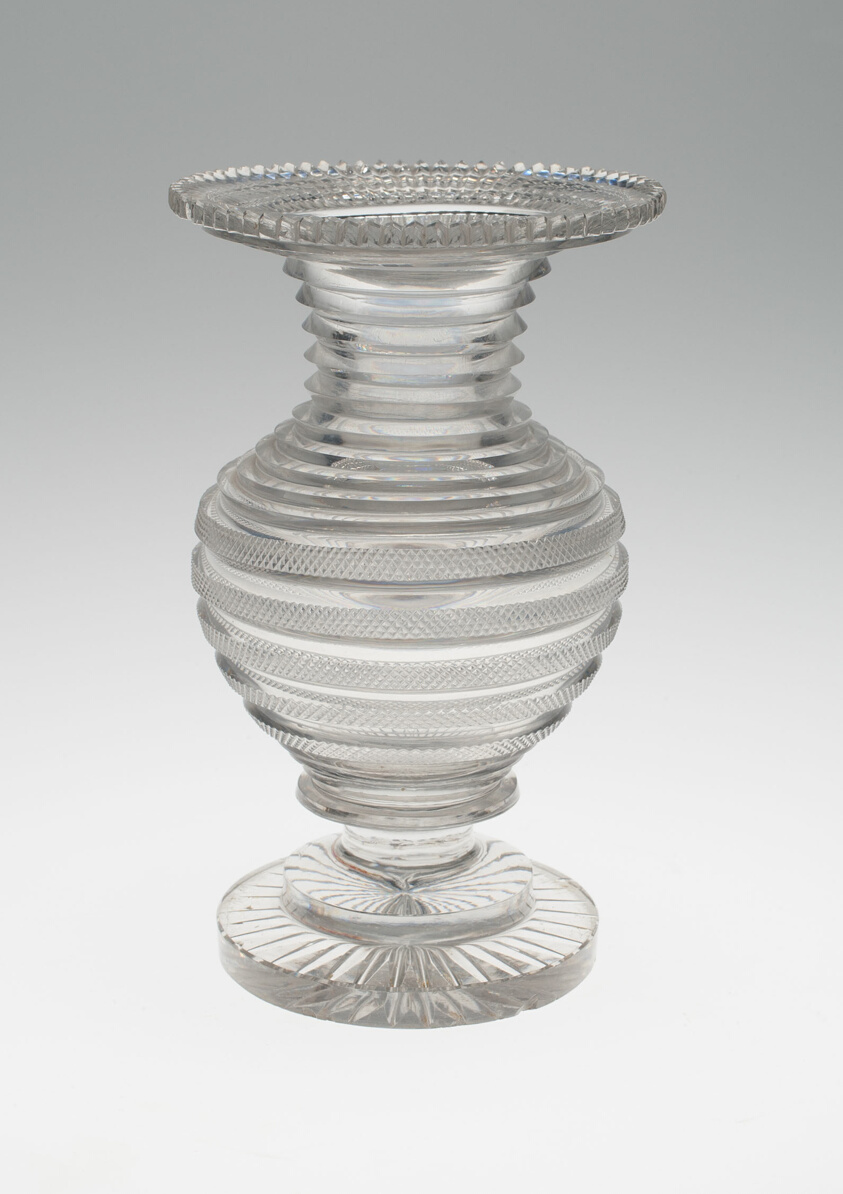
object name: Glass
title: Vase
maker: France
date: c. 1800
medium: Glass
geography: France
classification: vase; glass; vessel; european decorative arts